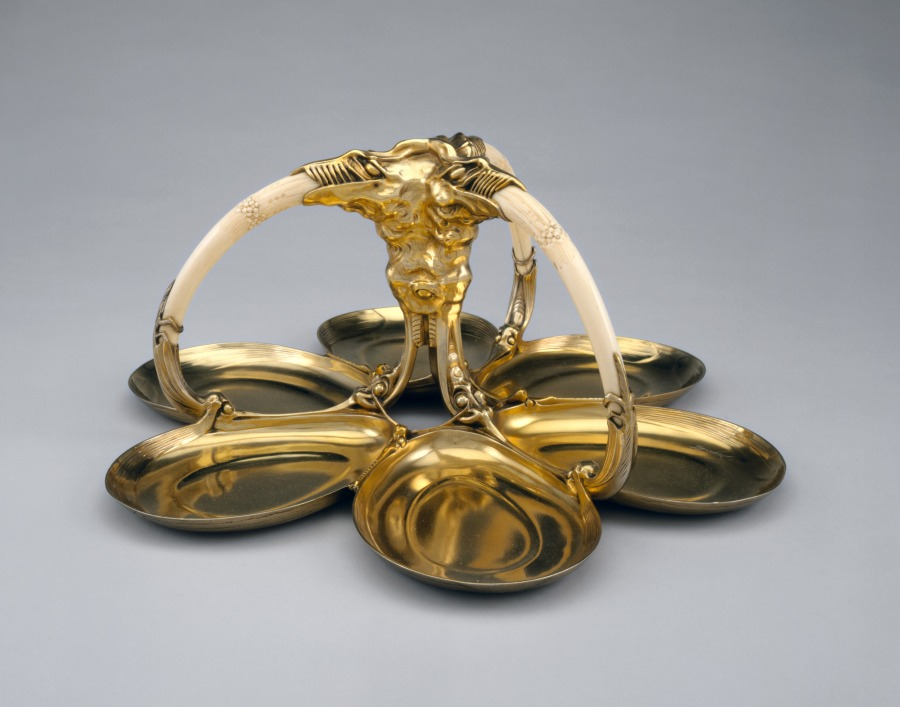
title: Salver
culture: France, Paris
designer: Carlo Bugatti (Italian, 1856–1940)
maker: Adrien-Aurélien Hebrard (French, 1866–1937)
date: c. 1907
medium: Gilt silver and ivory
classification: Silver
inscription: inscribed inside one of six ovoid compartments: "Bugatti" in ligature. Engraved on back: A.A. HEBRAND/ 8 RUE ROYAL/PARIS FRANCE.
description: This tea and coffee service, salver, and table, together with some now missing cups, were all designed by Carlo Bugatti as an ensemble and presented at the 1902 exposition devoted to decorative arts in Turin, Italy. The set was probably acquired from Bugatti's 1907 exhibition at the Galerie Hébrard in Paris by a wealthy South African widow, Anna Blake, who was living there at the time. Some of the animal and insect motifs suggest mythical beasts or the fossils of prehistoric animals. When Mrs. Blake returned to Cape Town, she took these and other pieces designed by Bugatti with her, and they remained in South Africa throughout her lifetime.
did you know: Carlo Bugatti's sons achieved illustrious careers of their own. Rembrandt Bugatti (1884-1916) became a celebrated sculptor, and Ettore Bugatti (1881-1947) manufactured luxurious automobiles and racing cars.